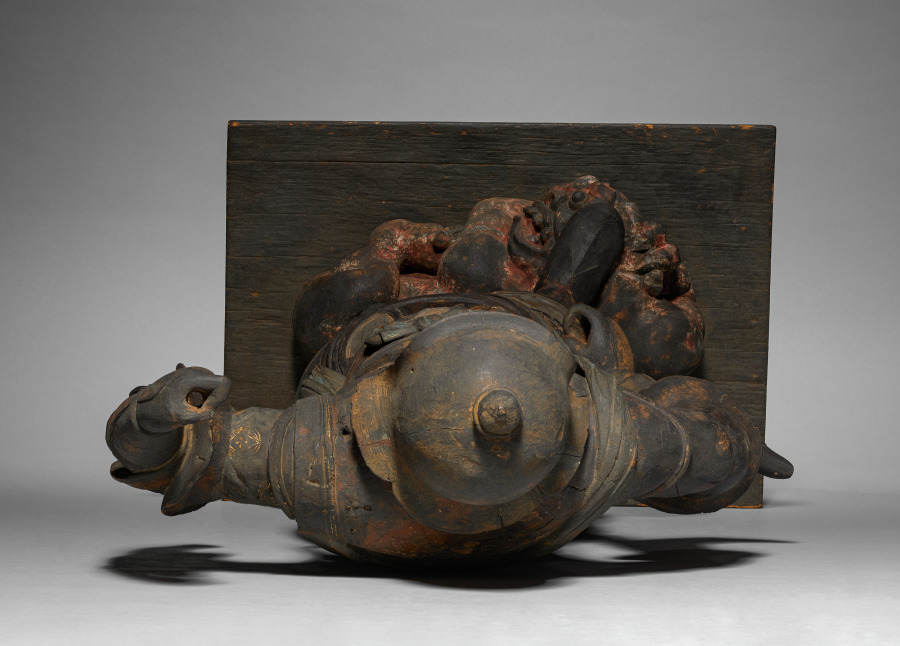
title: Guardian Figure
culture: Japan, Heian period (794–1185)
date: 1000s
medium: wood with polychromy and kirikane (cut-gold)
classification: Sculpture